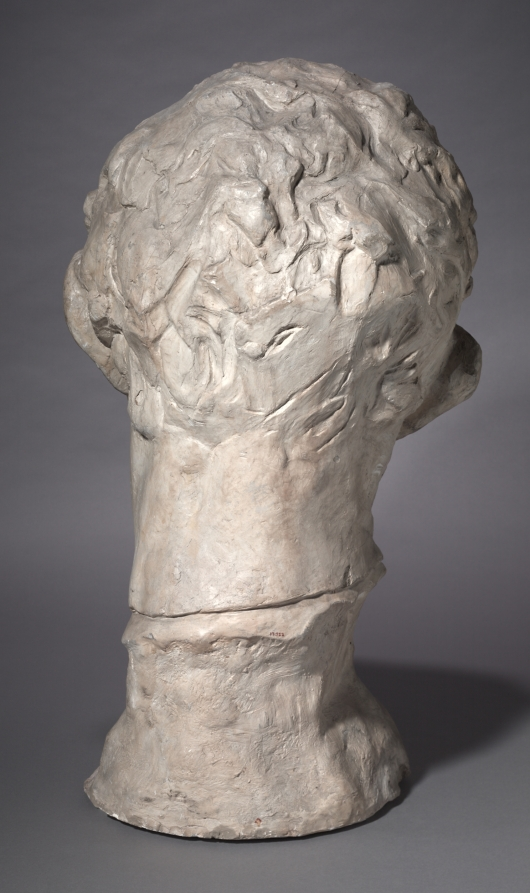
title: Heroic Head of Pierre de Wissant, One of the Burghers of Calais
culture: France, late 19th-early 20th Century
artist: Auguste Rodin (French, 1840–1917)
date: 1886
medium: plaster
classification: Sculpture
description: This sculpture depicts one of the figures in Rodin’s large public monument The Burghers of Calais (1884–89), featuring six French men who volunteered to be taken prisoner by the English in exchange for lifting the siege of Calais during the Hundred Years War (1337–1453). Pierre de Wissant’s anguished expression suggests extreme mental suffering as he contemplates his expected execution. Rodin exhibited a life-size version of the figure as an independent work before completing the monument. He later made multiple versions in various sizes and media. This plaster features a highly expressive, hand-worked surface inscribed in places with graphite and covered with delicate, tinted washes.